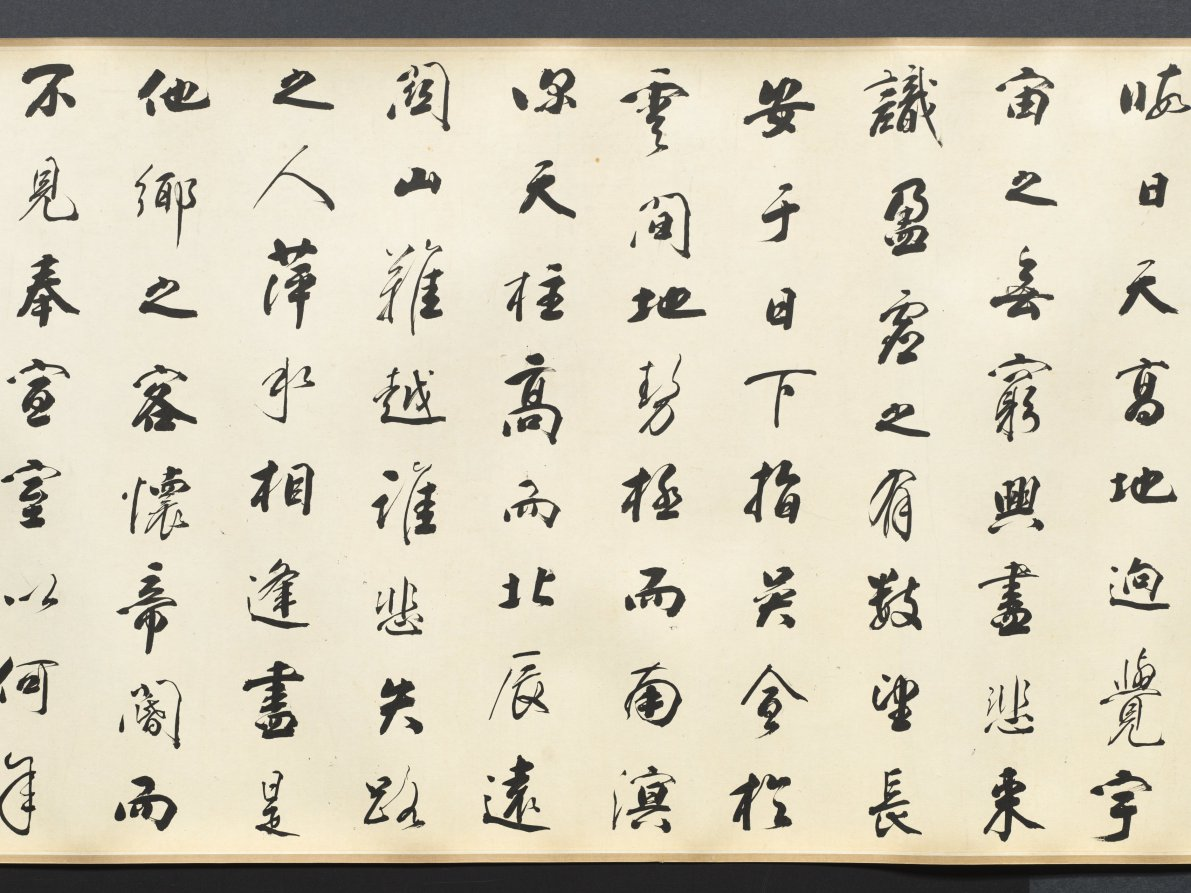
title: Calligraphy in Running Style based on Wang Bo's Essay on Tengwang Pavilion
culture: China, Changbai, Qing dynasty (1644-1911)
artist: Tiebao (Chinese, 1752–1824)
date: 1811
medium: handscroll, ink on paper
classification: Calligraphy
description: A member of the Donggo clan, Tiebao belonged to the Manchu Plain Yellow Banner army. As an official in the Qing court, he endured considerable vicissitude and his career was never smooth. Celebrated as a man of letters, he oversaw the publications of the Manchu military system as well as an anthology of poems by members of the imperial family and other Manchu dignitaries. In calligraphy, he was regarded as the equal of such eighteenth-century luminaries as Liu Yong (1720-1805) and Weng Fanggang (1733-1818). This handscroll is a work of his mature years and is exemplary of his disciplined and highly subtle approach to the art of calligraphy.